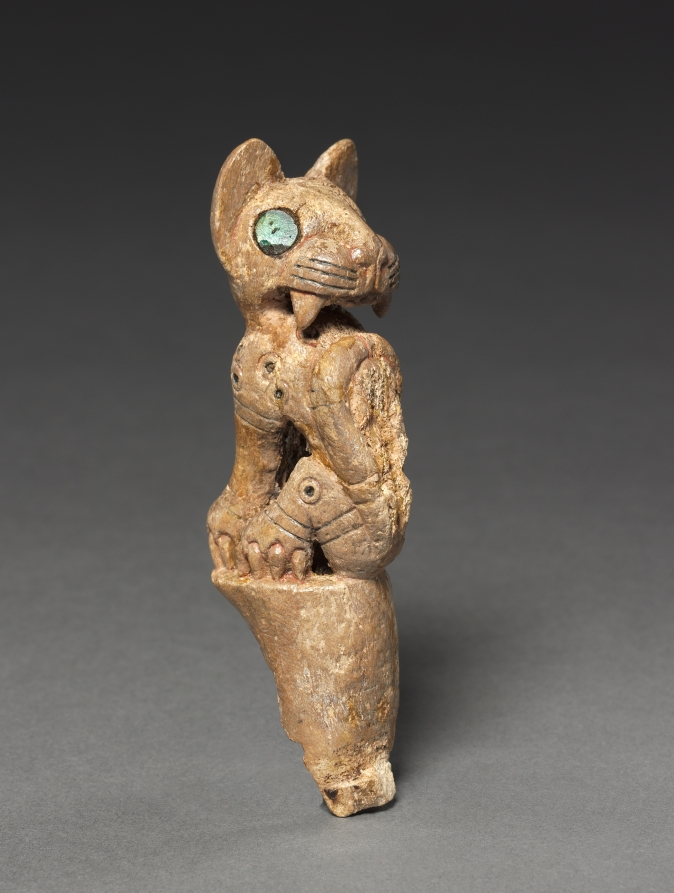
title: Handle of a Throwing Stick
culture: Peru, South Coast, Tiwanaku style, 400-1000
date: c. 700–900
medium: bone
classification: Arms and Armor